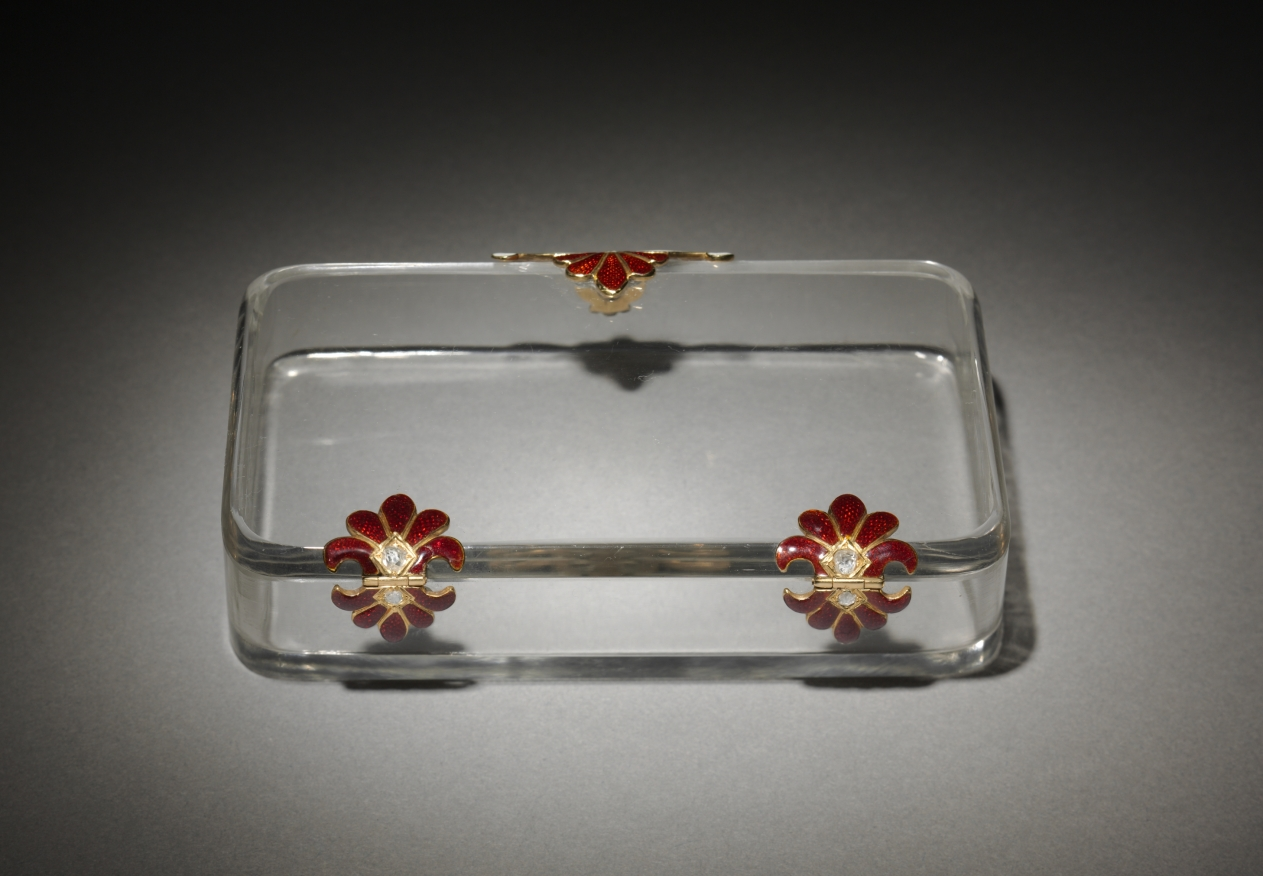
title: Cigarette Case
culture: Russia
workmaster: Mikhail Evlampievich Perkhin (Russian, 1860–1903)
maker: House of Fabergé (Russian, 1842–1918)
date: c.1895–1910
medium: rock crystal, enamel, gold, sapphire, diamond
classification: Rock crystal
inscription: Hallmark for Mikhail Perkhin (in Cyrillic); Fabergé (in Cyrillic).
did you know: Rock crystal is the name given to all clear colorless quartz also known as pure quartz.